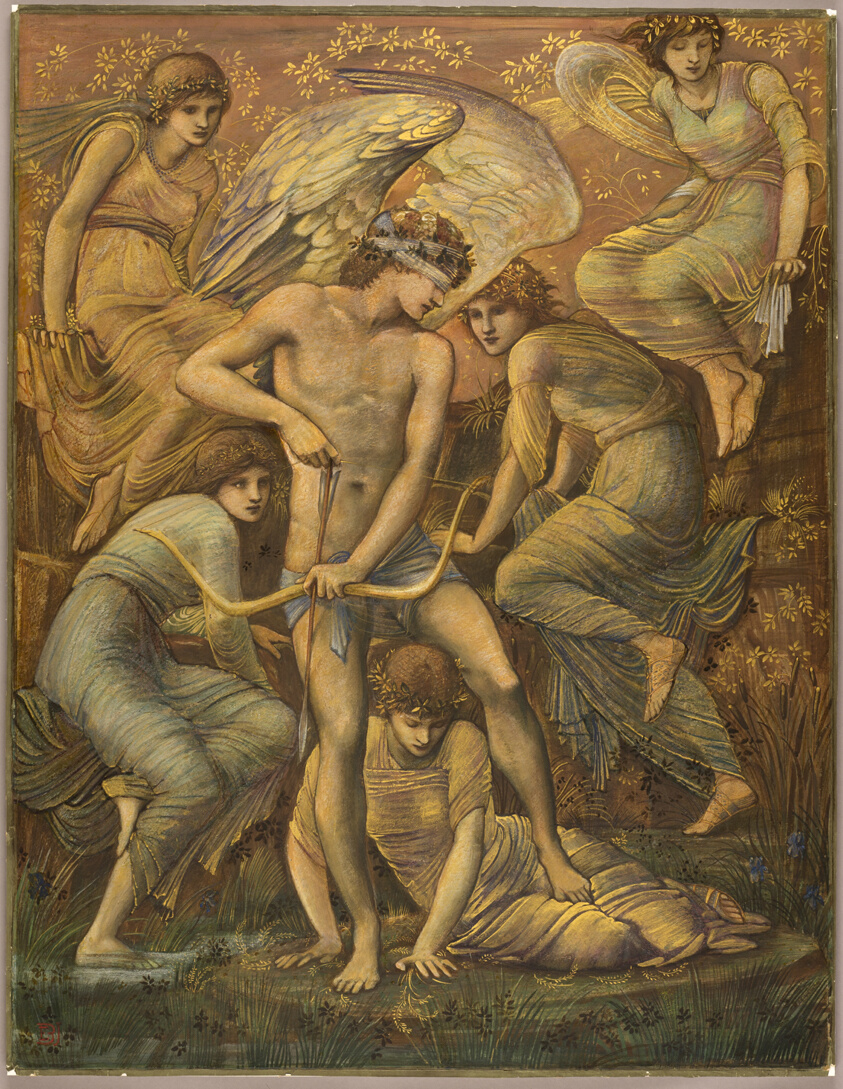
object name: Drawing and Watercolor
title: Cupid's Hunting Fields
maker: Sir Edward Burne-Jones (English, 1833-1898)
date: 1885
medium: Gouache, with watercolor and gold and silver paints on ivory wove paper, laid down on linen canvas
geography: England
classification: gouache; drawings (visual works); prints and drawing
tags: mythology